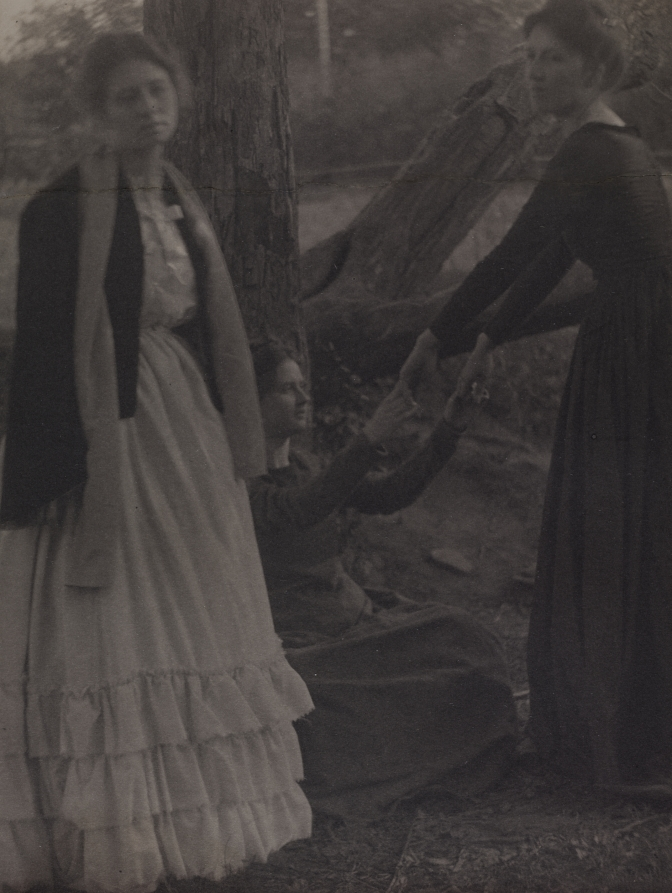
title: Three Girls in the Woods (Julia Hall McCune, Stella Howard, and Letitia Felix)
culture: America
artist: Clarence H. White (American, 1871–1925)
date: 1902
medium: platinum print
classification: Photograph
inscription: Written in pencil on verso: "25 [circled]"; "Photo by Clarence White / left=Julia McCune / center=Stella Howard / right=Lettie Felix"